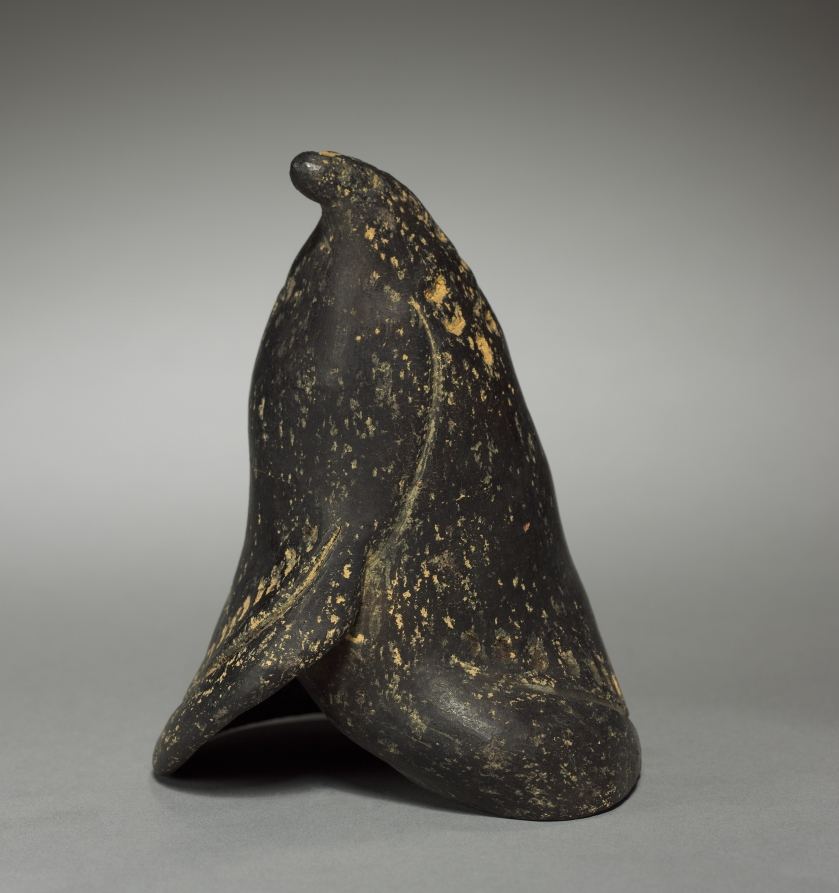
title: Ornament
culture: Colombia, 19th-20th century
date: before 1921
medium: black ware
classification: Ceramic